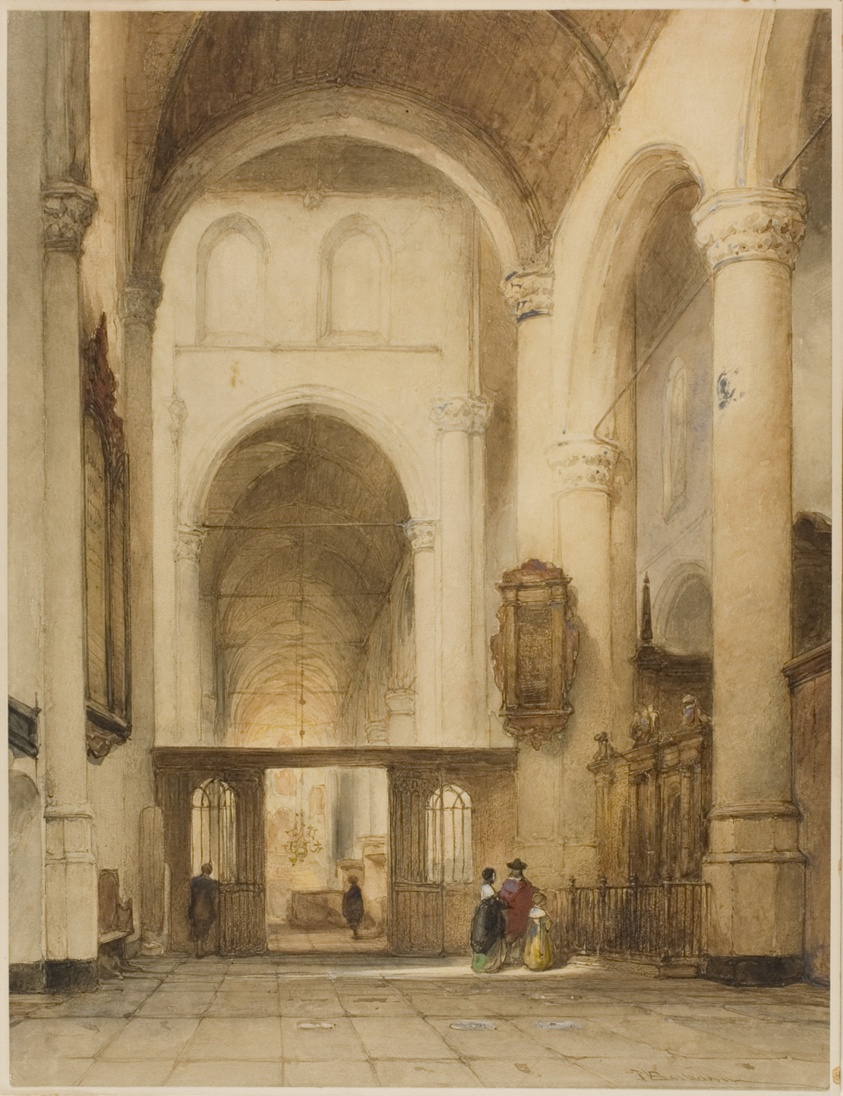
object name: Drawing and Watercolor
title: Church Interior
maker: Johannes Bosboom (Dutch, 1817-1891)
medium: Watercolor and gouache, over graphite, on cream laid paper, laid down on cream board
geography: Holland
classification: watercolor; drawings (visual works); prints and drawing